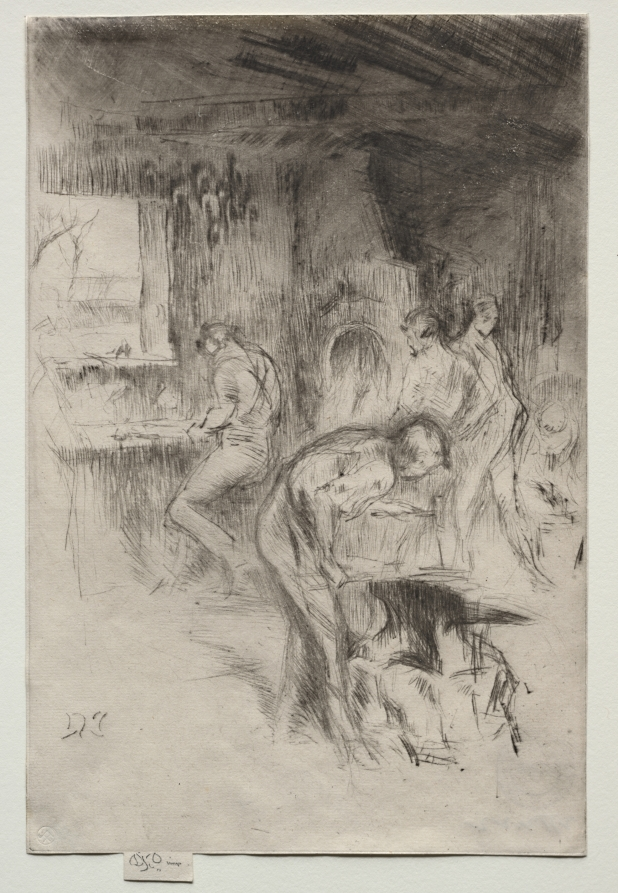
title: The Little Forge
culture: America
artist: James McNeill Whistler (American, 1834–1903)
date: 1875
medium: drypoint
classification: Print